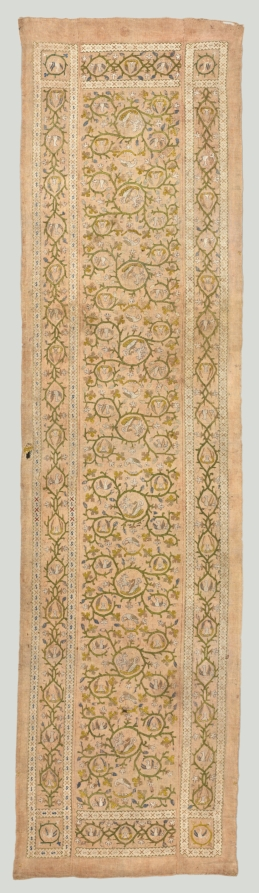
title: Embroidery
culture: Switzerland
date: 17th century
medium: embroidery; silk on linen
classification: Embroidery